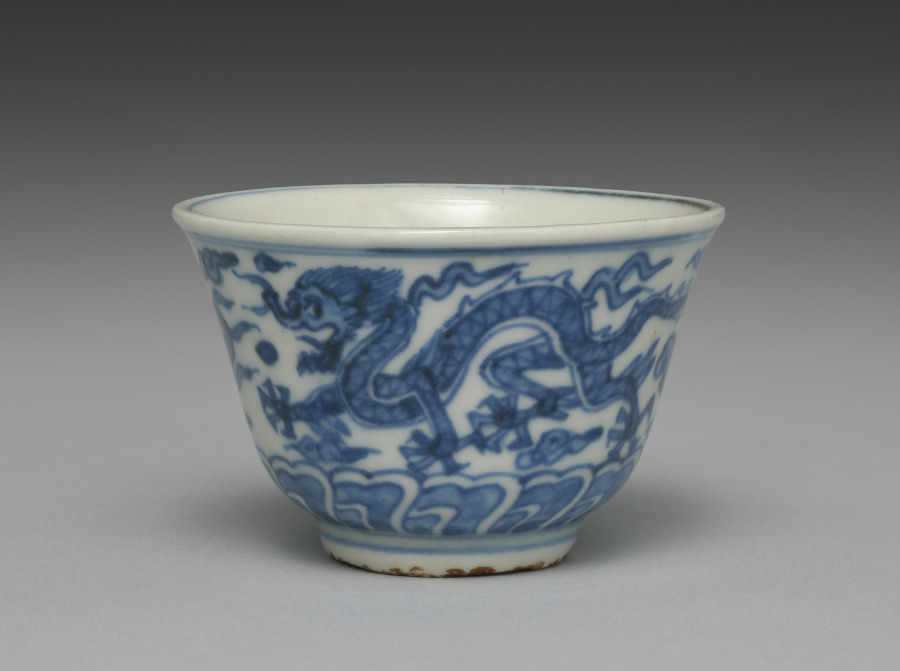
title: Cup from Tea Cups with Dragons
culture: Japan, Edo period (1615–1868)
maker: Seifū Yohei I (Japanese, 1801–1861)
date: 1840s–57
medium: One from a set of five tea cups; porcelain with underglaze blue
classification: Ceramic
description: Seifū Yohei I made both blue and white porcelains after Ming dynasty (1368–1644) Chinese wares fired in the kilns at Jingdezhen for export. He also made colorful stoneware in the style of his teacher, Nin’ami Dōhachi (Takahashi Dōhachi II) (1783–1855).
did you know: A small figure of an elephant serves as the handle for the lid.